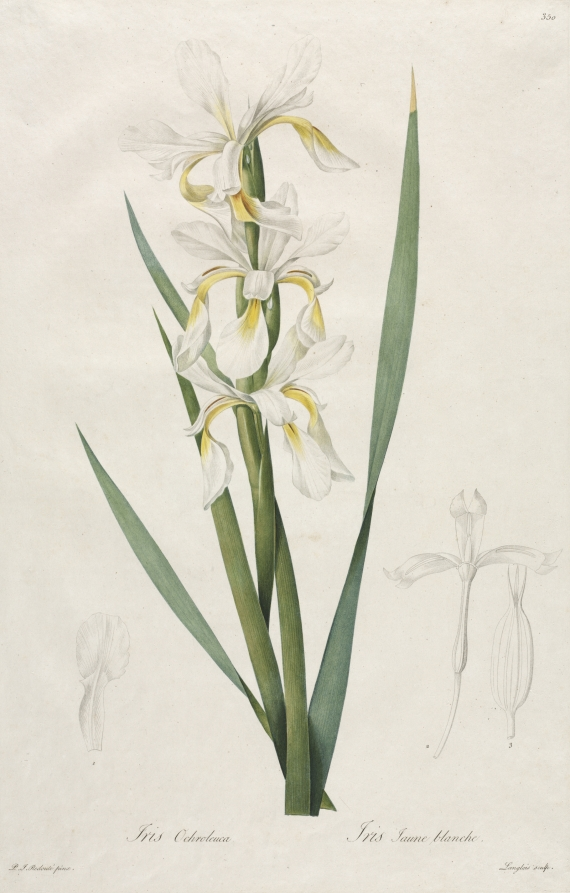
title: Gold-banded Iris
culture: France, 19th century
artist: Henri Joseph Redouté (French, 1766–1853)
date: 1812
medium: stipple, roulette and line engraving with hand coloring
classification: Print